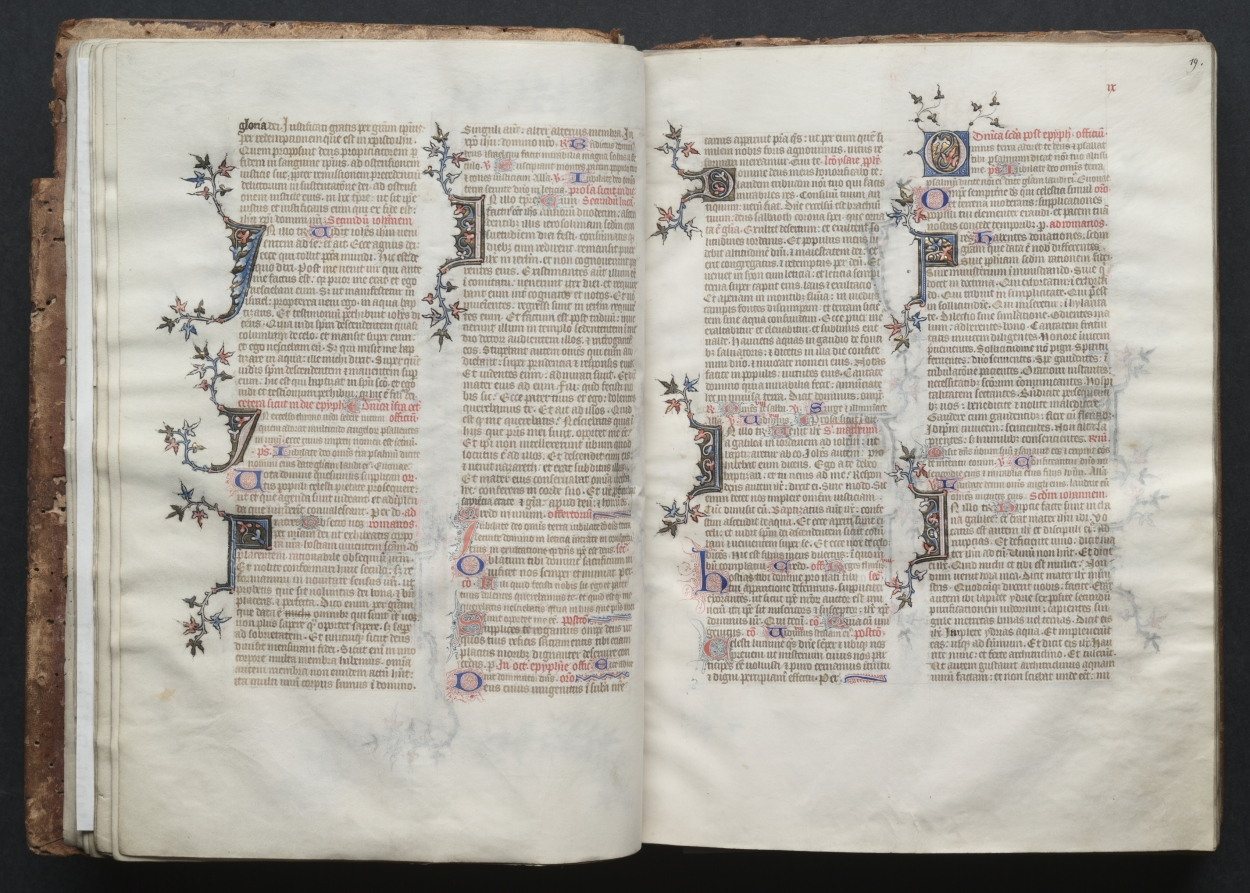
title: The Gotha Missal: Fol. 18v, Text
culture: France, Paris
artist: Master of the Boqueteaux (French)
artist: and Workshop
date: c. 1375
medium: ink, tempera, and gold on vellum; blind-tooled leather binding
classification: Bound Volume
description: The style and quality of this manuscript's decoration is typical of deluxe Parisian books made for aristocratic or royal patrons. Most of the book's decoration appears to be the work of the Master of the Boqueteaux, an artist active at the court of King Charles V (died 1380). His style was apparently shared by a number of book illuminators working in and around Paris. It is very possible that the Gotha Missal belonged to Charles V, but is not provable because the manuscript has no royal portraits and lacks a colophon. Given the book's magnificent decoration, however, it would seem that it was produced for a Valois prince, if not for the king himself. The manuscript receives its name from the German dukes of Gotha, its later owners.